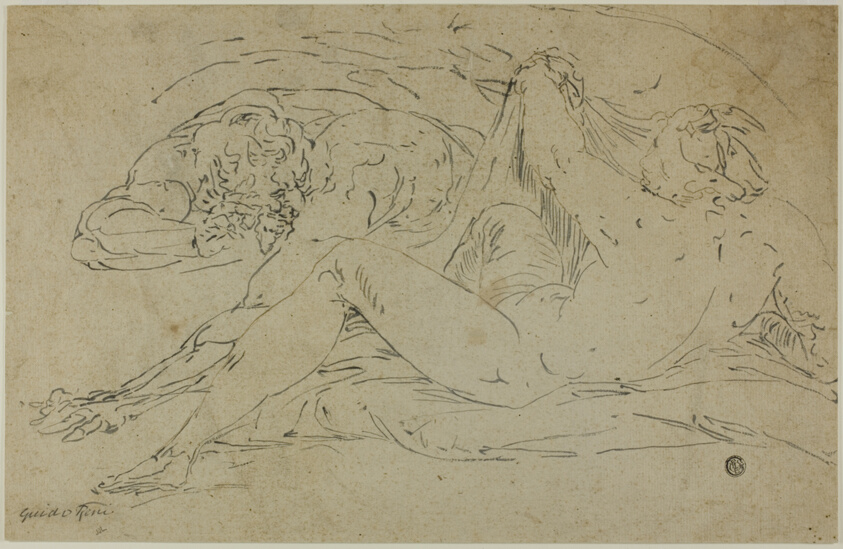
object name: Drawing and Watercolor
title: Nymph and Satyr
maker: Follower of Luca Cambiaso (Italian, 1527-1585)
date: after 1560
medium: Brush and gray ink with traces of pen and brown ink, on buff laid paper, laid down on ivory laid paper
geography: Italy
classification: pen and ink drawings; drawings (visual works); prints and drawing